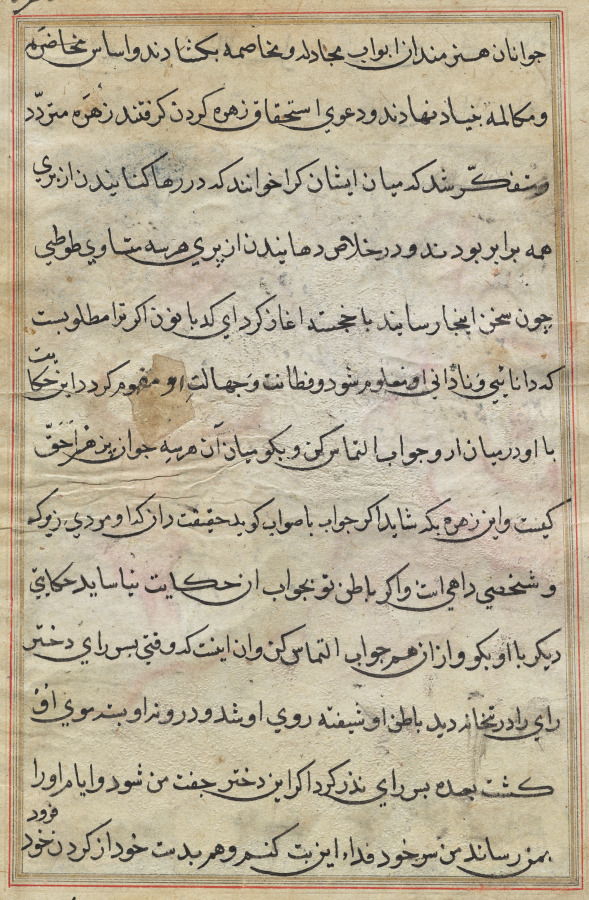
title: Page from Tales of a Parrot (Tuti-nama): text page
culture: Mughal India, court of Akbar (reigned 1556–1605)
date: c. 1560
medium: gum tempera, ink, and gold on paper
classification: Painting